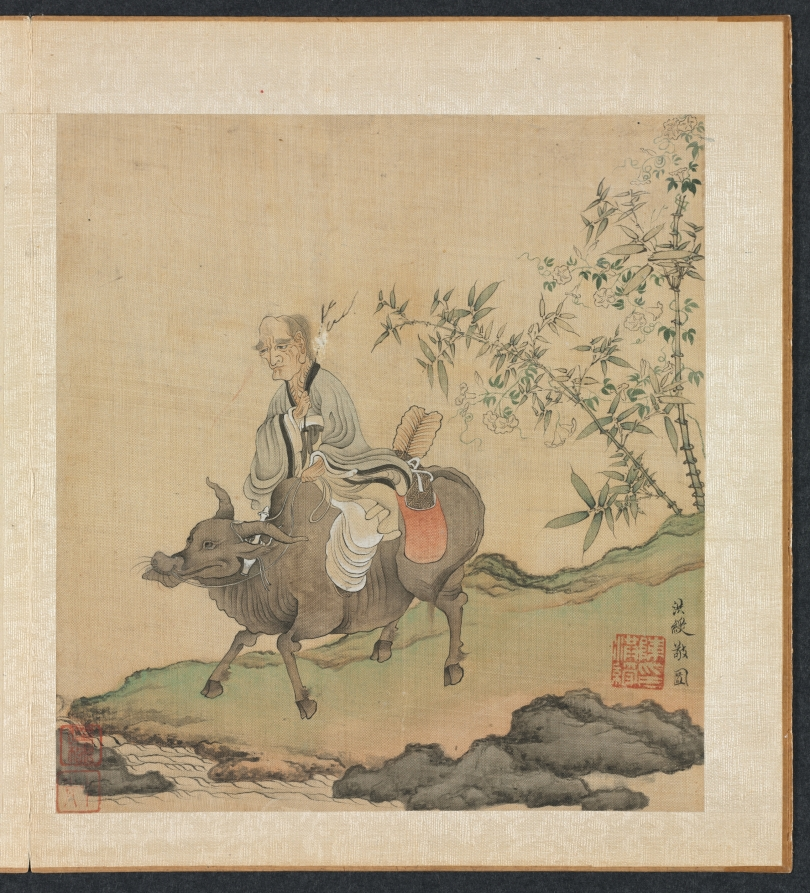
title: Paintings after Ancient Masters: Laozi Riding an Ox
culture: China, Ming dynasty (1368–1644)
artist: Chen Hongshou (Chinese, 1598/99–1652)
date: 1598–1652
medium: album leaf; ink and color on silk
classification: Painting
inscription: Hongshou respectfully painted. [Seal] Chen yin Hongshou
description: The twenty paintings in this double-album by Chen Hongshou include landscapes, figures, and flowers. It also has one leaf featuring a woman, an often-used subject not found in the other albums from the latter part of his career. His late works are wonderful summations of Chen's peculiar and quirky art--archaistic, hyper-refined--but without accompanying shallowness or sentimentality. His figures and landscapes in the late albums are miniaturized, not unlike the small Chinese gardens, or the carefully selected small table rocks or old roots used for contemplation to see the world in miniature. This loss of scale is quite deliberate and reflects the psychological situation of a depressed class like the Ming loyalist officials and scholars, deprived of their integrity and honor, and forced to lead a diminished and restricted existence.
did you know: Laozi was an ancient Chinese philosopher who wrote the Daodejing, the foundational text of Daoism.